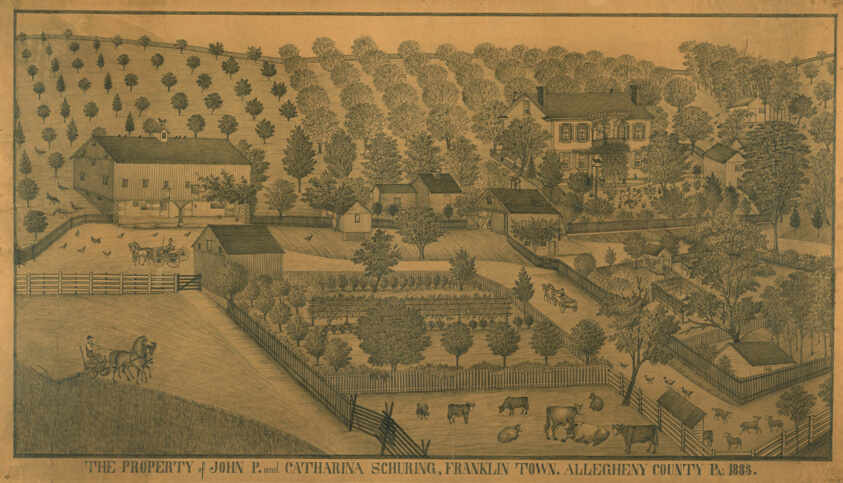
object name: Drawing and Watercolor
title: The Property of John P. and Catharina Schuring, Franklin Town, Allegheny County, Pennsylvania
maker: Ferdinand A. Brader (American, flourished 1883-1893)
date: 1883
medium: Graphite on paper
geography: United States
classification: graphite; drawings (visual works); prints and drawing